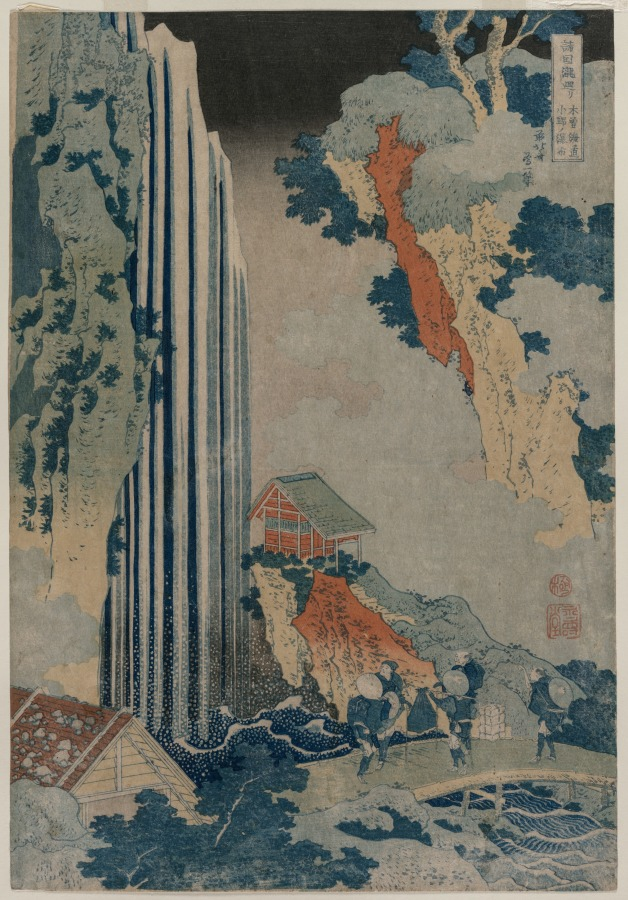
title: Ono Waterfall on the Kiso Road (from the series a Tour of Waterfalls in the Provinces)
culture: Japan, Edo period (1615–1868)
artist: Katsushika Hokusai (Japanese, 1760–1849)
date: early 1830s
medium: color woodblock print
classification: Print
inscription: Signature: Zen Hokusai Iitsu hitsu Publisher: Nishimuraya Yohachi (Eijudo) Censorship Seal: Hiwame